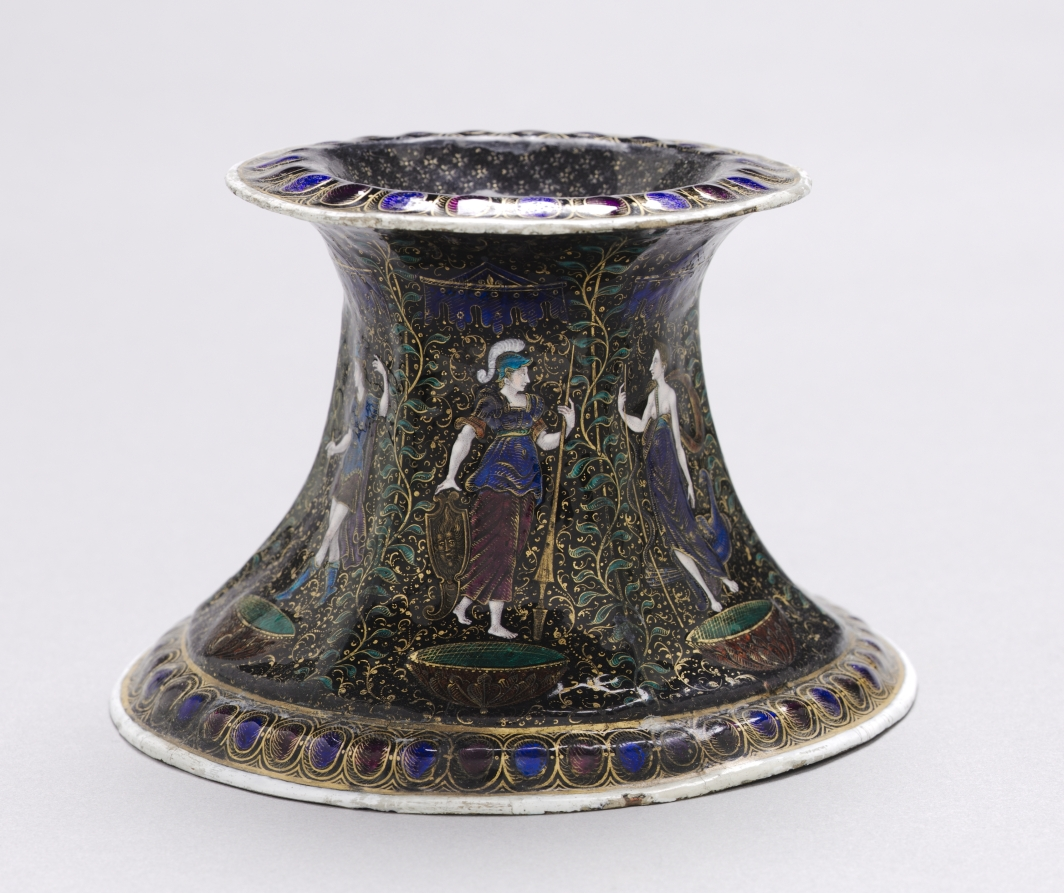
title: Salt Dish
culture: France, Limoges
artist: Jean Limousin (French, 1528–c. 1610)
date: early 1600s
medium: painted enamel on copper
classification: Ceramic